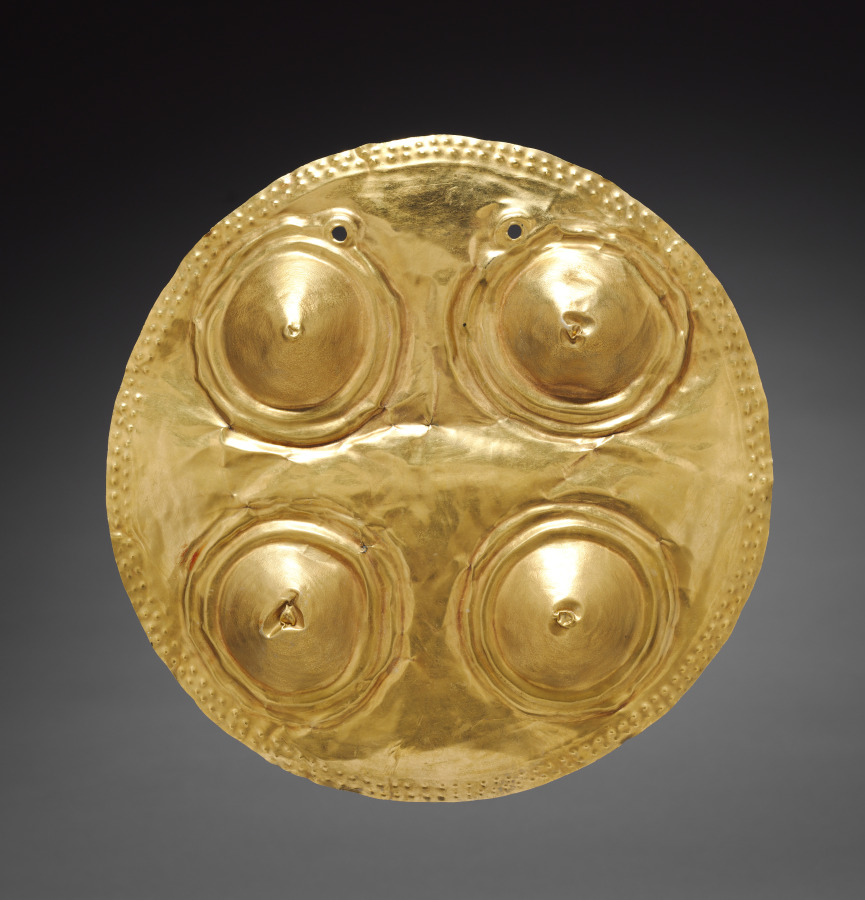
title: Disk-Shaped Chest Plaque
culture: Costa Rica or Panama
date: c. 700–1550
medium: hammered gold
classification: Metalwork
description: Technologically, this pectoral (chest plaque) is unlike the other gold shown in this case. Rather than being cast of molten metal, it was made by hammering metal into a thin sheet. Costa Rican and Panamanian metalsmiths favored casting, but they were skilled in hammering, a technology better suited to creating large objects with glittering, reflective surfaces. The import of the breast-like protrusions is unknown.